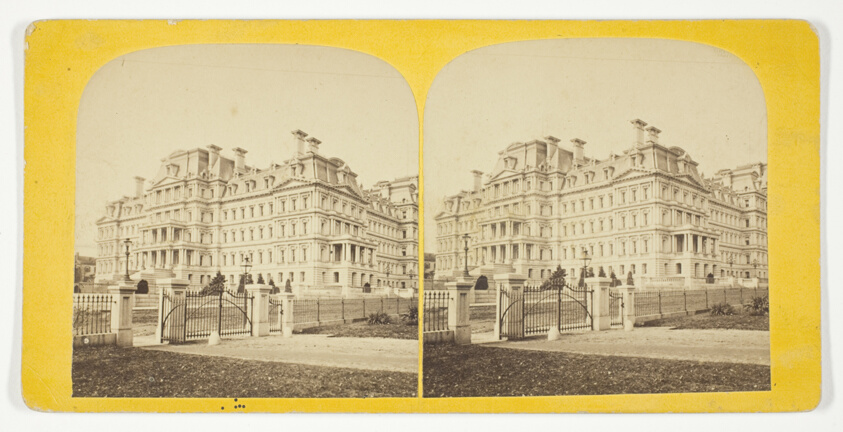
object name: Photograph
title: Untitled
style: 19th century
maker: Artist unknown; 19th century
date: 1875/99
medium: Albumen print, stereo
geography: United States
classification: photography; photograph